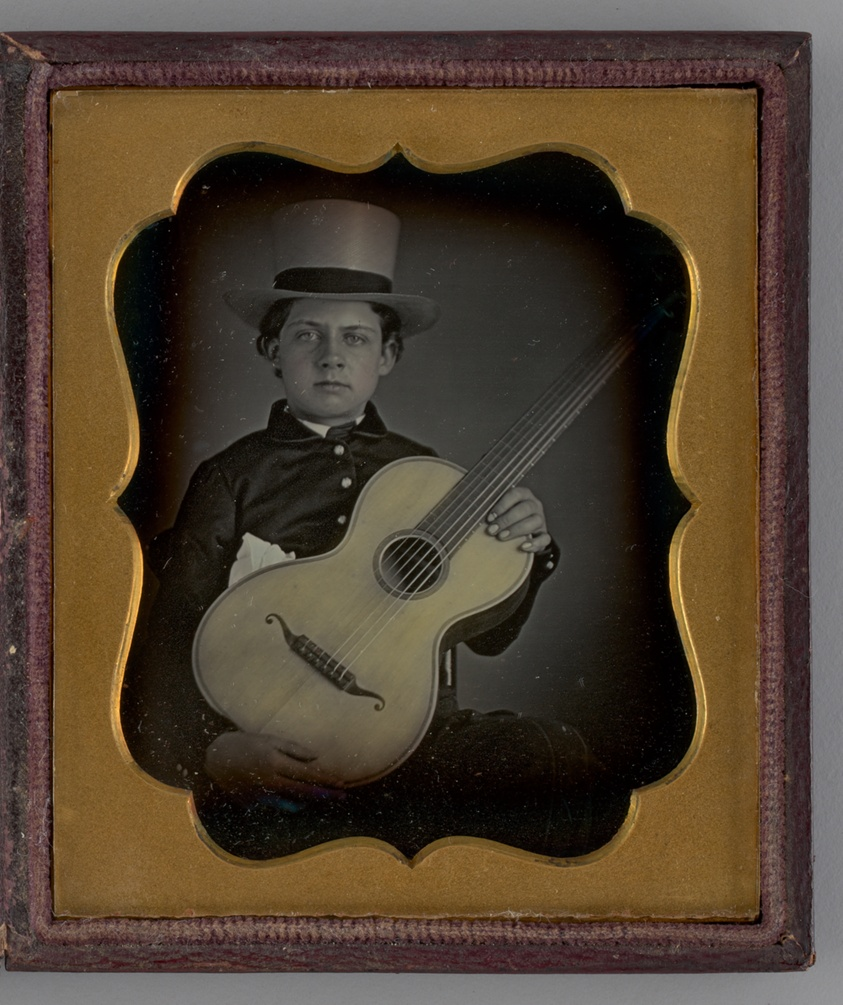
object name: Photograph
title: Untitled (Portrait of a Boy Holding a Guitar)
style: 19th century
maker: Unknown maker; American, 19th century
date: 1848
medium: Daguerreotype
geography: United States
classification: portrait; photograph; daguerreotype; photographic process; portrait; photography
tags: lundberg collection, portraits: male subject, portraits, portrait, Male, guitars, boys